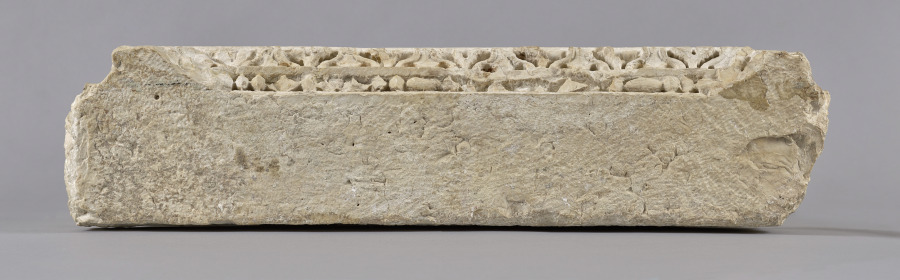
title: Tomb Relief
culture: Syria, Palmyra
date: 230 CE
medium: limestone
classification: Sculpture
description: Although its findspot is unknown, this high relief almost certainly once sealed a burial niche of a mausoleum at Palmyra. It illustrates a blending of Roman and Parthian artistic traditions. Set within a sumptuous border of beads and leaves, a wealthy man awakens on a luxuriously cushioned bed as his attendant offers him a wine bowl decorated with crosshatchings. Both are dressed according to Parthian custom, wearing pants and pleated tunics, but the man’s languid pose is taken from classical prototypes. The subject is a variant of a formulaic funerary banquet scene in which proffered wine welcomes the deceased into a well-appointed afterlife.